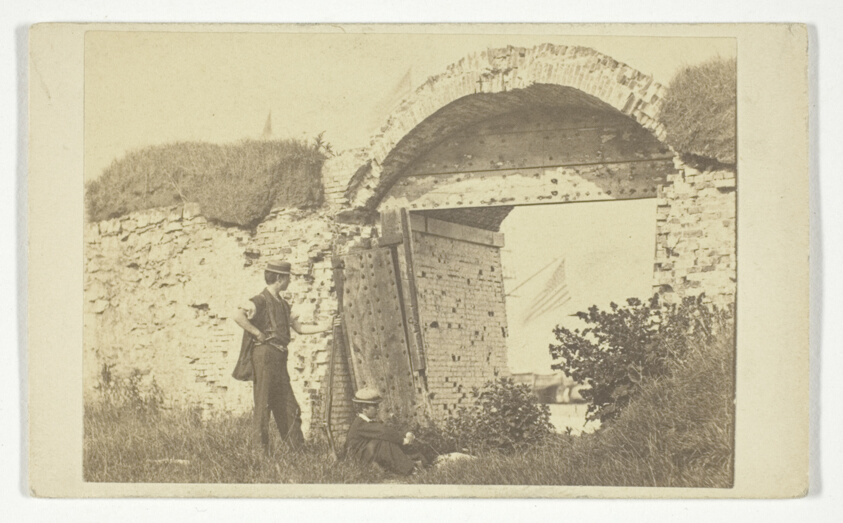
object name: Photograph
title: Old Fort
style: 19th century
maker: James Wallace Black (American, 1825–1896)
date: 1959/74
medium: Albumen print (carte-de-visite)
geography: United States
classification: carte-de-visite (albumen); photographic process; photography; card photographs; photograph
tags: Collected by Hugh Edwards